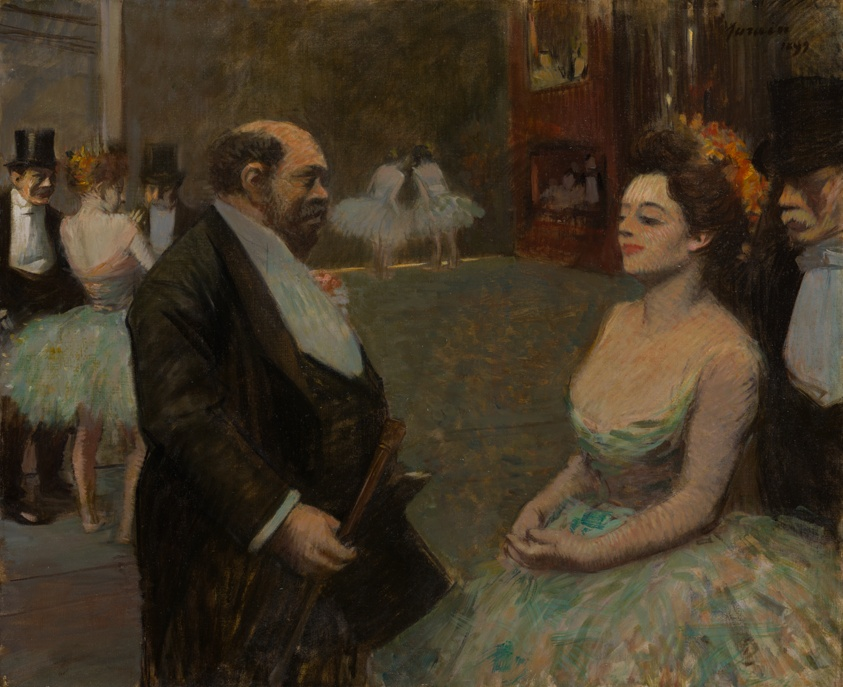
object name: Painting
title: In the Wings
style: nineteenth century, 19th century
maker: Jean Louis Forain (French, 1852–1931)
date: 1899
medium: Oil on canvas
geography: France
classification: oil on canvas; european painting; france; french; oil paintings (visual works); paint; painting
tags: Century of Progress, status, wealth, social, French, Paris, France, costume, performance, woman, men, dancers, dance, ballet, world's fairs, Chicago World's Fairs